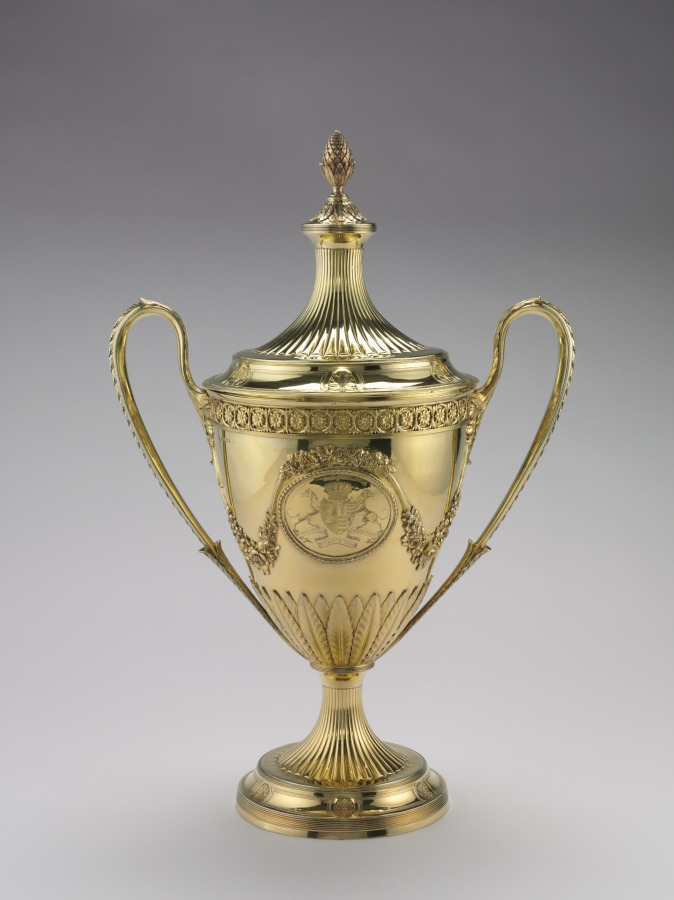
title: Trophy Cup and Cover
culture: England, 18th century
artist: Peter Bateman (British, 1740–1825)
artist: Anne Bateman (British, 1748–1813)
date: 1792–1793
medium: silver gilt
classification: Silver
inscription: Engraved arms: Grosvenor impaling Egerton and Grey (arms of Robert Grosvenor (1767–1845), the first Marquess of Westminster, and Lady Eleanor Egerton (1770–1846))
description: Silver fulfilled a prominent role in projecting wealth, status, power, and ritual in British life during the 1600s and 1700s. Elaborate forms such as this trophy, with its swags of flowers, neoclassical rosettes, acanthus spears, and acorn finial, not only represented wealth in its sheer silver weight but also provided royal and aristocratic owners a surface for displaying engraved coats of arms. Engraved on one side of this trophy cup can be found the arms of Robert Grosvenor (1767–1845), the first Marquess of Westminster, and Lady Eleanor Egerton (1770–1846), whom he married in 1794, a year after the trophy’s completion. The other side depicts preparations for a horserace, the most culturally significant leisure activity enjoyed by aristocratic families in the 1700s. Grosvenor owned a number of famous horses and was likely awarded this trophy following a successful race.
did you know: The graceful form of this trophy by Peter Bateman and his sister-in-law Anne Dowling Bateman is reminiscent of the elegant designs produced by their mother Hester Bateman (1708–1794), one of the most celebrated female silversmiths of all time.